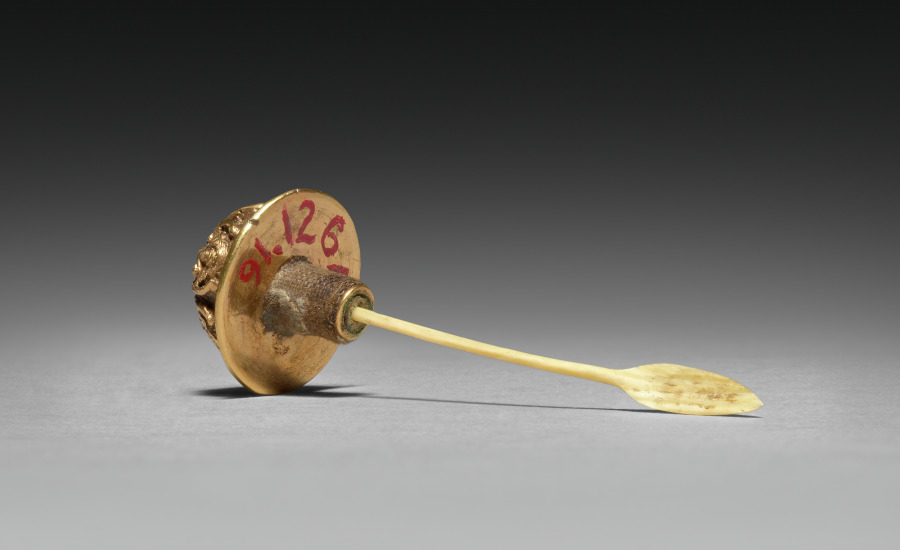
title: Snuff Bottle with European Figures (stopper)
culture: China, Qing dynasty (1644-1911), Qianlong mark and reign (1736-95)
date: 1736–95 or later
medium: painted enamel on copper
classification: Enamel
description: Snuff bottles were introduced from Europe to China around the 1700s to hold portable snuff or medicine.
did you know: The stopper is decorated with bats, which traditionally symbolize good luck, since both words (蝠 and 福) are both pronounced as fu in Chinese.